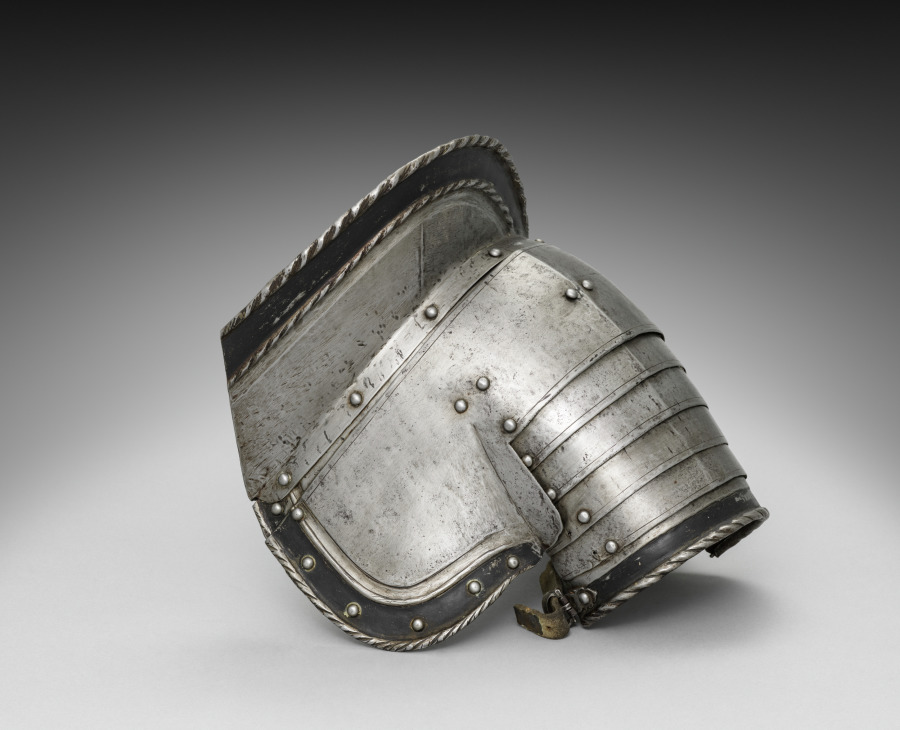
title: Left Pauldron with Guard Brace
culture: Germany, 19th century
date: 1801–1900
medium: steel with black paint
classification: Arms and Armor